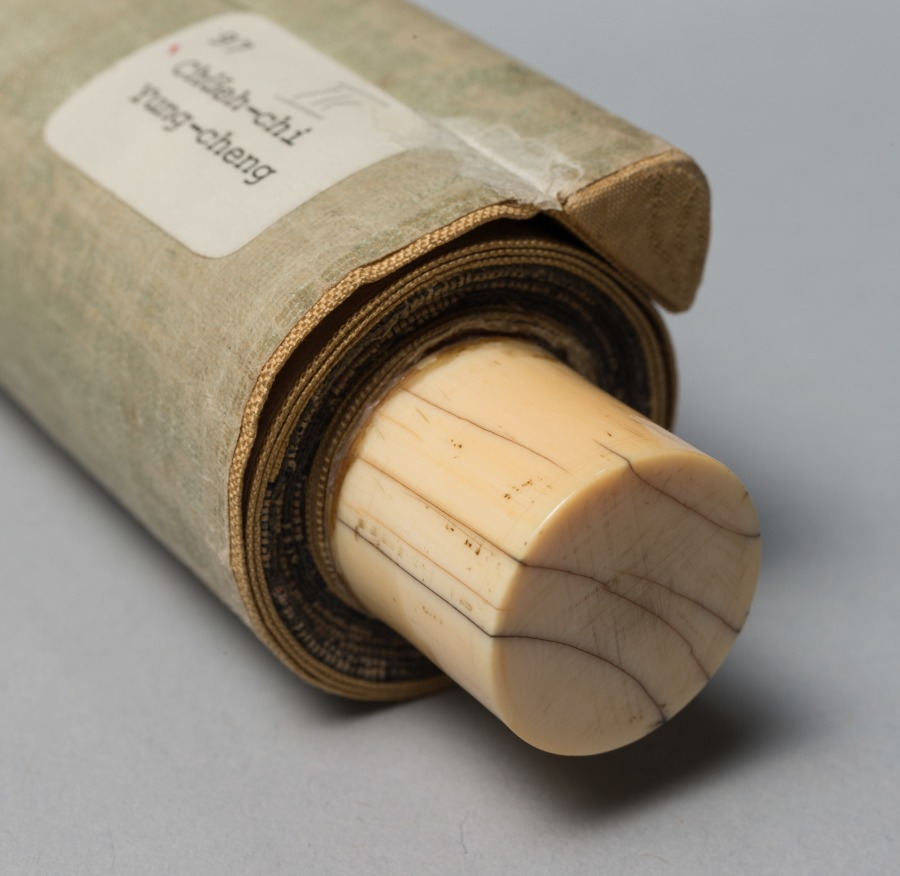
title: White-Robed Guanyin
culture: China, Yuan dynasty (1271-1368)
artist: Jueji Yongzhong (Chinese, active around 1300)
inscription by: Zhongfeng Mingben (Chinese, 1263–1323)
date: late 1200s–early 1300s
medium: hanging scroll; ink on paper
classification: Painting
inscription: Artist's signature: Huanzhu Yongzhong. Inscription by Zhongfeng Mingben: The right thinking [Samkalpa] is embodied within His deep meditation on the Buddha [naga-samadhi]. Retaining not even one single object of thought, A perfect harmony was wonderfully achieved. In the endless time and space, His all-embracing compassion prevails. [signed] Mingben of Huanzhu paying his respects.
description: Guanyin, the bodhisattva of infinite compassion (Avalokiteshvara, in Sanskrit), reveals himself in many forms. According to Buddhist belief, one such manifestation is the white-robed Guanyin sitting on a rock on the island of Putuo (Potalaka, in Sanskrit), located along the coast not far from Ningbo, in Zhejiang Province, China. Here, the figure was swiftly drawn in only a few ink lines. The inscription above is by Zhongfeng Mingben, perhaps the most widely respected and influential Chan (Zen in Japanese) master in the Yuan dynasty. The artist’s signature is a single line below on the left: Huanzhu Yongzhong.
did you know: The CMA collection includes a drawing by a Japanese priest, CMA 1978.47.2, inspired by this composition.